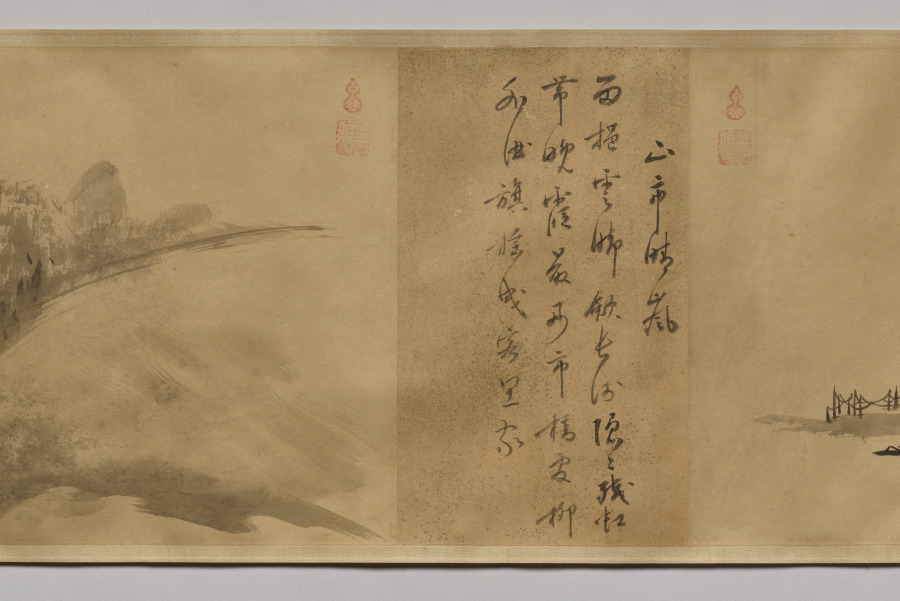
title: Poems and Pictures of the Eight Views of Xiao-Xiang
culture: Japan, Momoyama period (1573–1615)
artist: Unkoku Tōgan (Japanese, 1547–1618)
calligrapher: Inkei Gentetsu (Japanese, 1562–1612)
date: 1605–12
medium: Handscroll; ink on paper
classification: Painting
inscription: Each painting sealed with red gourd-shaped seal reading Unkoku (雲谷) and a square seal reading Tōgan (等顔).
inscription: Each painting prefaced with a titled poem on the Eight Views of Xiao-Xiang by Yujian Ruofen (active late 13th century) inscribed by Japanese Buddhist monk Inkei Gentetsu (1562–1612).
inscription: 右寫玉㵎之筆勢／雪舟末葉等顔筆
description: Unkoku Tōgan brushed these scenes using the splashed-ink technique associated in Japan with the Chinese monk Yujian Ruofen (active late 1200s). Xiao-Xiang refers to the region in present-day Hunan province, where the Xiang River and its tributaries converge. Each of the eight views evokes a time of day or season. The earliest surviving series of Xiao-Xiang paintings is by Wang Hong (active mid-1100s), but textual evidence tells us the theme appears earlier. It was later adopted in Japan and Korea, as seen here. The poems were inscribed by Inkei Gentetsu, the third abbot of the Rinzai Zen temple Tōshunji, Japan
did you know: The “Tō” of Tōgan comes from the name of painter Sesshū Tōyō (1420–1506).